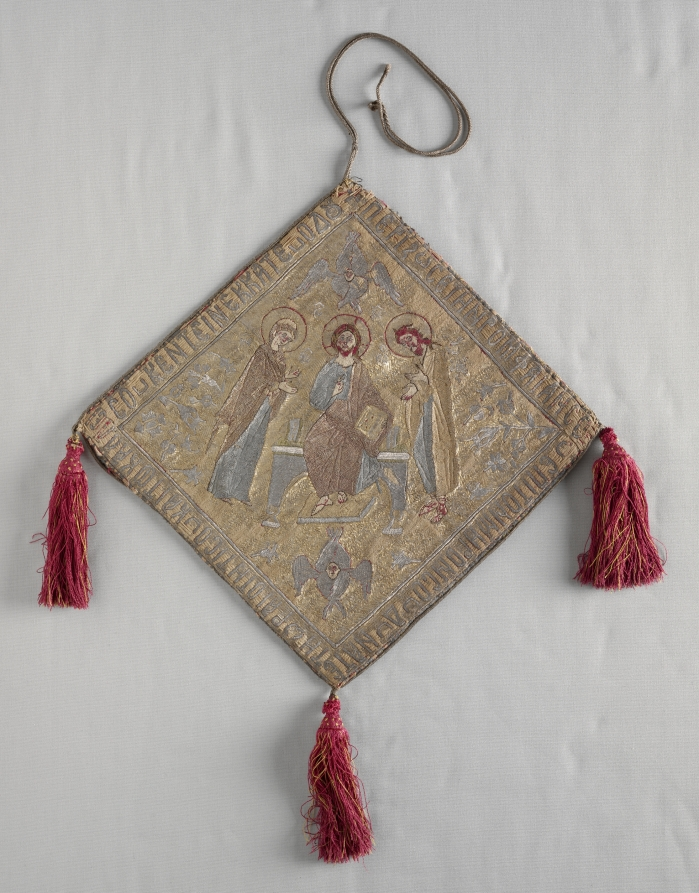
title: Ecclesiastical Embroidery (Epigonation)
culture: Armenia and Greece, 17th century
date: 17th century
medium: embroidery; silk and metallic threads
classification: Embroidery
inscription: Christ sitting on a throne: "IESUS CHRISTOS," to his left the Virgin Mary: "METER THEOU," to his right St. John: "HO HAGIOS IOANNES O APOSTOLOS."